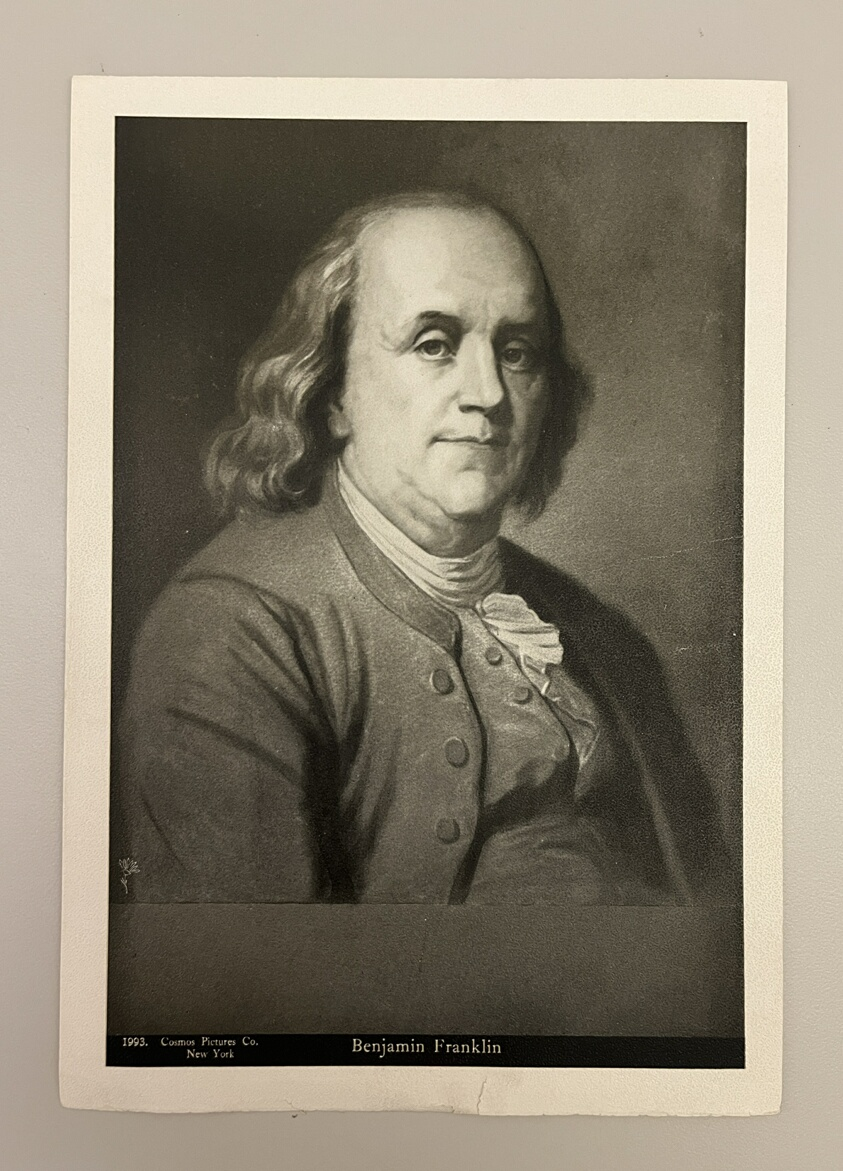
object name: Print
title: Benjamin Franklin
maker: Artist Unknown (Likely American or British, 19th century); printed by Cosmos Pictures Co. (American, 19th century)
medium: Lithograph on paper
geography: United States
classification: reproduction; print; prints and drawing